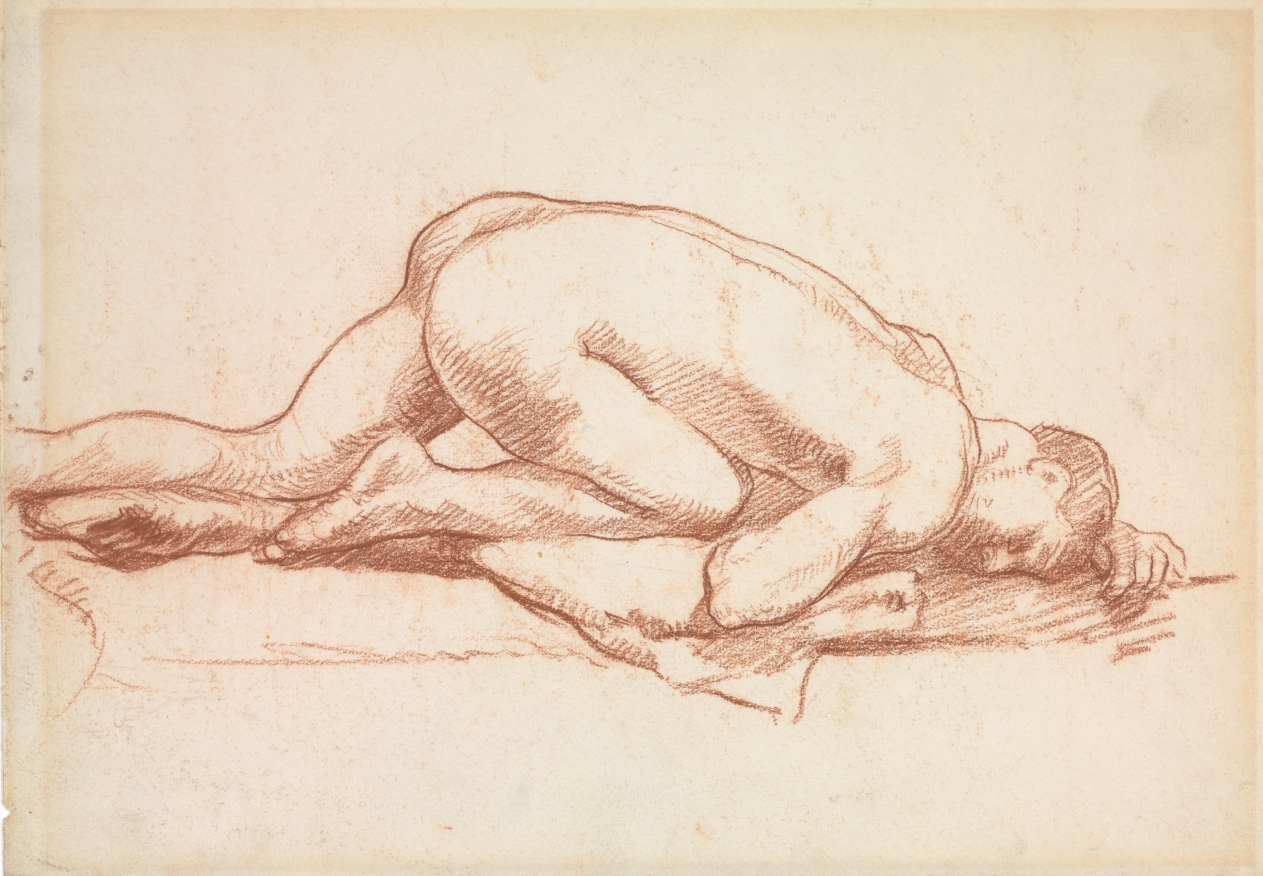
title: Crouching Male Nude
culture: England(?), 20th century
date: first half 1900s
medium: red chalk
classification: Drawing